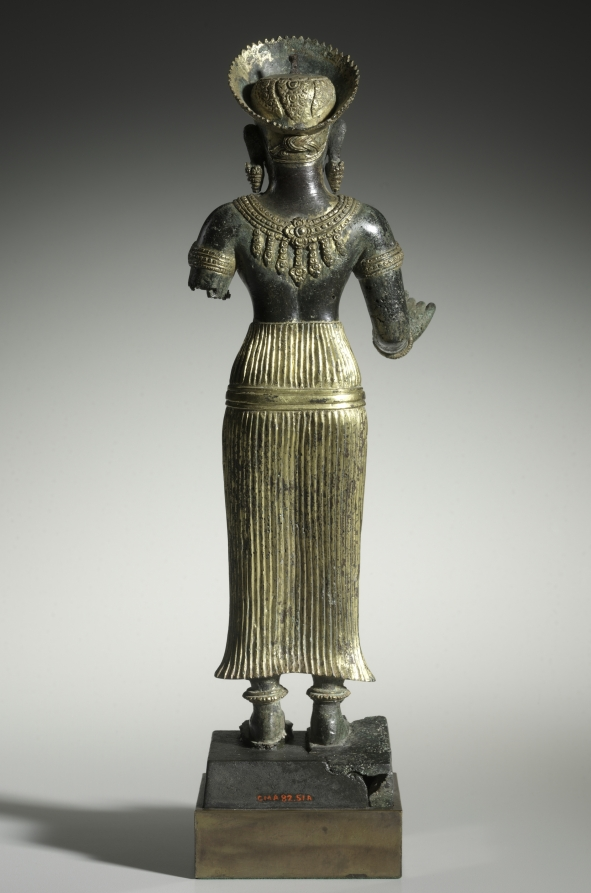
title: Royal Female Figure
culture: Cambodia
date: late 1000s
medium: partially gilt bronze and silver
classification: Sculpture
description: The identity of this figure is uncertain, since the objects she held are missing, and no other related sculptures have been located. Since she has only two arms and wears a crown, she is probably a royal woman. Semiprecious stones or metals, such as onyx or silver, would have been inlaid into her eyes and eyebrows, further enlivening her image. The gilded adornments are set off against her dark shining skin to dazzling effect. Most Cambodian stone sculptures have lost their gold jewelry, so this figure gives an accurate impression of how many would have looked when installed in their sanctuaries.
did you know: This royal female figure's eyebrows and pupils were originally inlaid with silver or semiprecious stones.